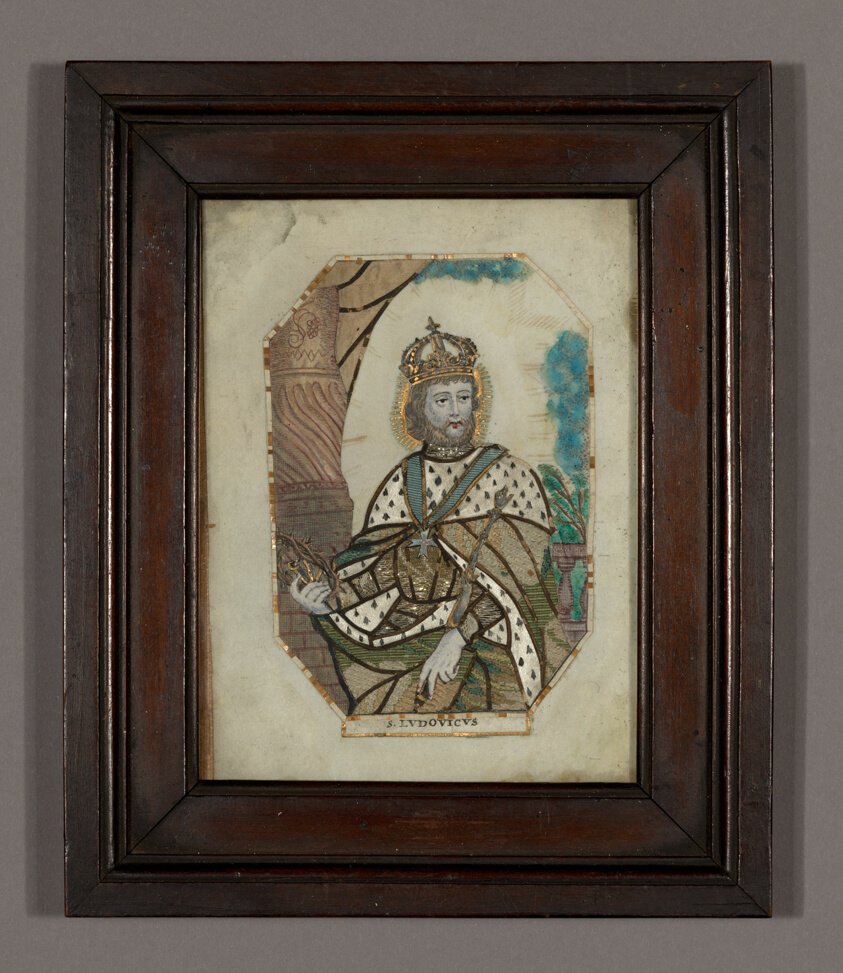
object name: Textile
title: St. Ludovicus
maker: Germany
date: 19th century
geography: Germany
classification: textile; weaving - printed